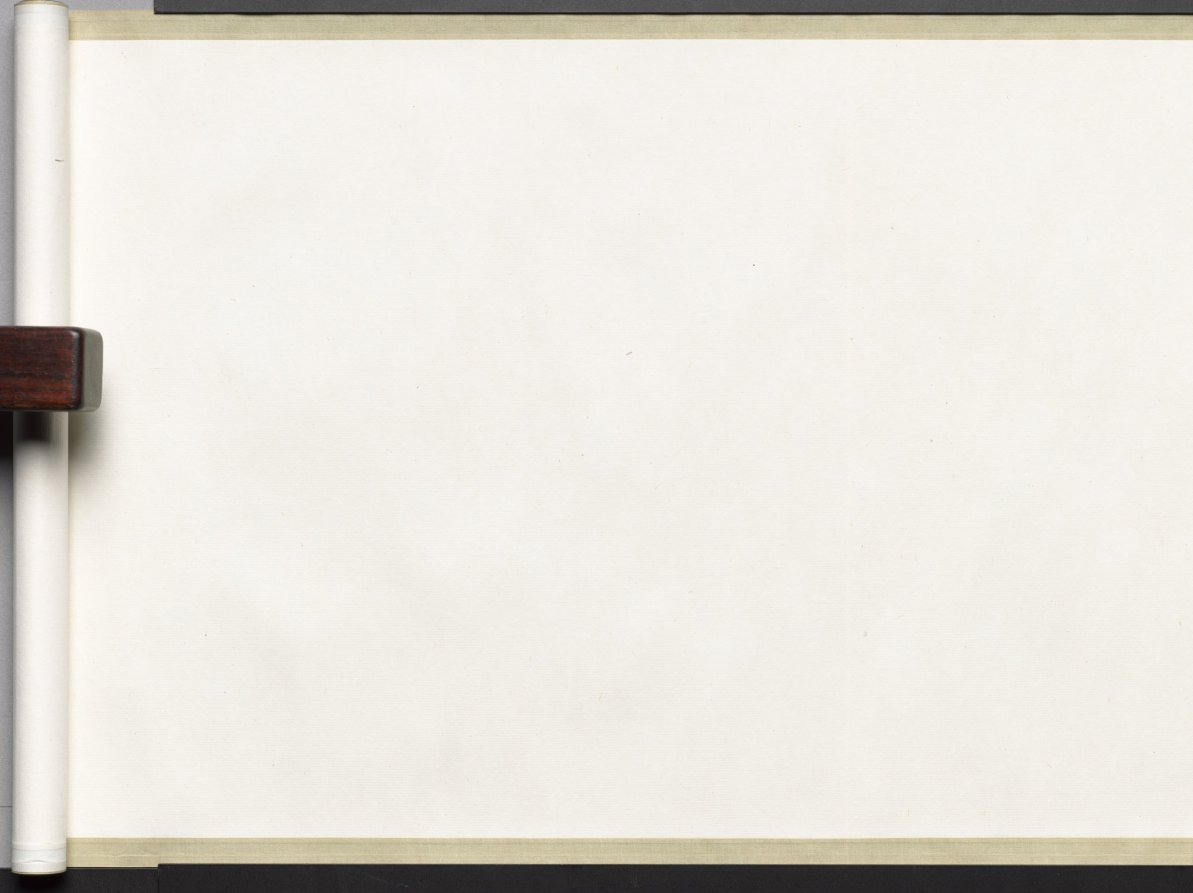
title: A Hundred Sparrows in a Lofty Grove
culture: China, Ming dynasty (1368–1644)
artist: attributed to Lin Liang (Chinese, 1416–1480)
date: 1368–1644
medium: handscroll; ink on silk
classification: Painting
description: Sparrows engaged in all kinds of activities frolic amid leafy branches, blades of grass, rocks, and a waterfall. As our eyes move over the scroll, the artist engages us in enjoying the sparrows’ carefree movements in a natural setting. The charming birds were painted from close observation in swift and fluent brushstrokes. Sparrows are a common bird and in Chinese painting they often represent the commoner in human society as opposed to the noble pheasant or peacock representative of the ruling class.